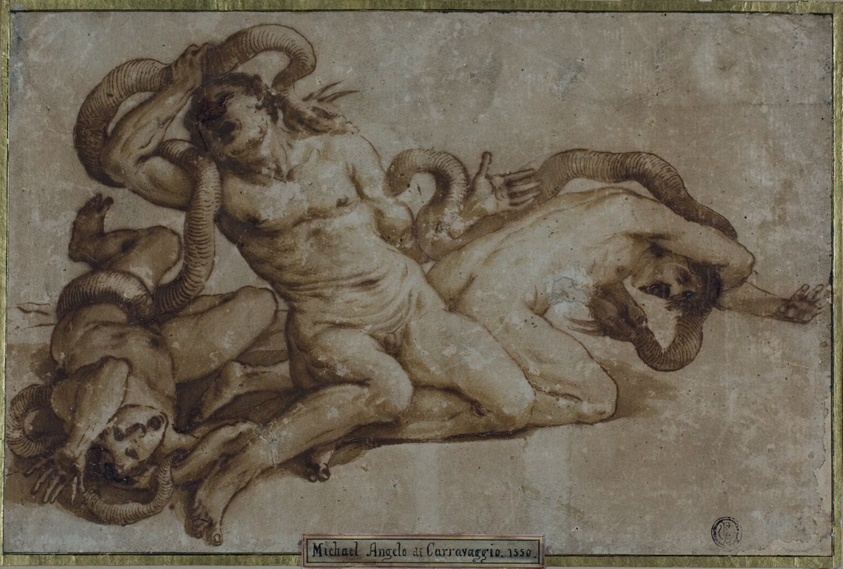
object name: Drawing and Watercolor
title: Laocoön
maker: Italian; 16th century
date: 1550/59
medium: Pen and iron gall ink with brush and brown wash, on tan laid paper, laid down on cream wove card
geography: Italy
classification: drawings (visual works); prints and drawing